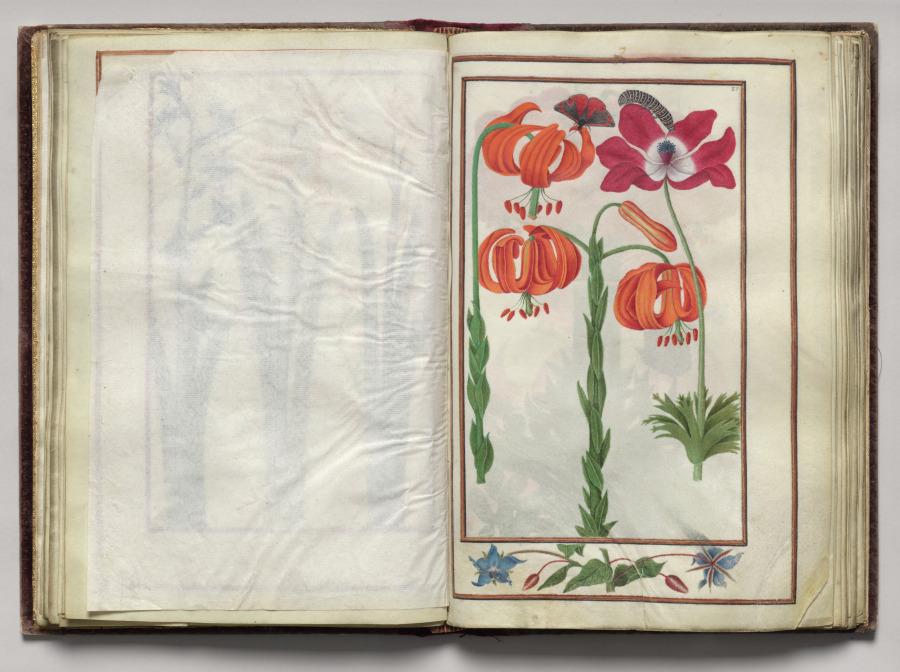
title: Florilegium (A Book of Flower Studies)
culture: France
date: 1608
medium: bound manuscript of 48 leaves, 77 drawings; watercolor, ink, silver, and gold over occasional traces of pencil, on vellum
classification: Bound Volume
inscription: Dated: Poitiers 1608 (on frontispiece) Signed: On frontispiece in black ink, lower right: Van Kuyk Notation on drawing: Frontispiece: in pencil, lower margin: * élève de Van Kessel, peintre flammand (* in pencil also appears in front of Van Kuyk's name).